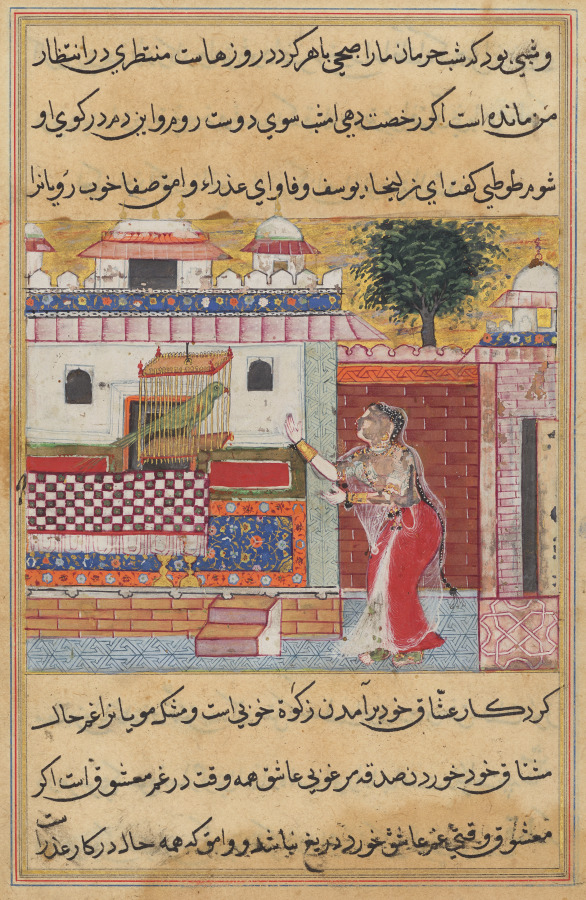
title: The Parrot Addresses Khujasta at the Beginning of the Twelfth Night, from a Tuti-nama (Tales of a Parrot)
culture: Mughal India, court of Akbar (reigned 1556–1605)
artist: Tara 1 (Indian, active 1550s-1590s)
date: c. 1560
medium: gum tempera, ink, and gold on paper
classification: Painting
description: Every night for 52 nights the sly domesticated parrot encourages his master's wife Khujasta to meet her lover under cover of darkness. Just before she leaves, he mentions a topic from a tantalizing tale; she becomes so curious that she cannot go out before hearing the whole story. By the time the story ends, dawn breaks, and it is too late for her to go out unnoticed. The gold sky and geometric tile patterns are derived from Persian sources while Khujasta's figure shown in profile and style of dress are purely Indian. The artist has chosen to tilt the carpet up in defiance of realistic perspective to show off the fine arabesque motif. The checkered bedspread calls attention to the empty bed and Khujasta's longing to be with her lover.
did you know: The gauzy fabric that Khujasta wears over her sari is called an odhani.